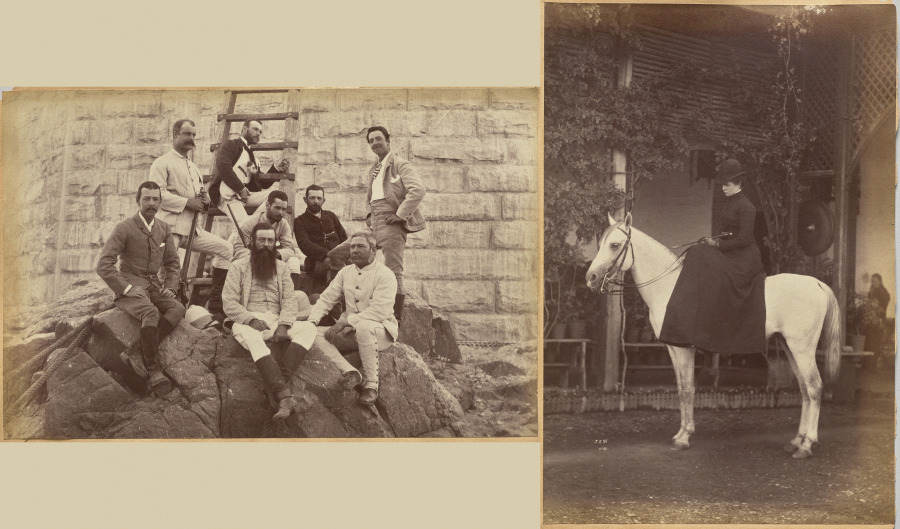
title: Managing staff of Meprs. Glover & Co. at Sindh Bridge (recto, top); Untitled: Woman on horse (verso, right)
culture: India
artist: Raja Deen Dayal (Indian, 1844–1905)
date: c. 1882–87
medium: albumen print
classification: Photograph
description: These photographs are part of an album, now disassembled, of around 105 photographs taken in India between 1885 and summer 1887 that provide glimpses into the lives of the British colonial elite and royal and upper-class Indians. The museum holds another group of 37 pictures from this album (2016.266), which was probably commissioned by a British civil servant visiting or working in India around 1888 as a personal souvenir of his experiences there.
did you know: Raja Deen Dayal is regarded now, and was considered during his lifetime, to be India’s most important 19th-century photographer.